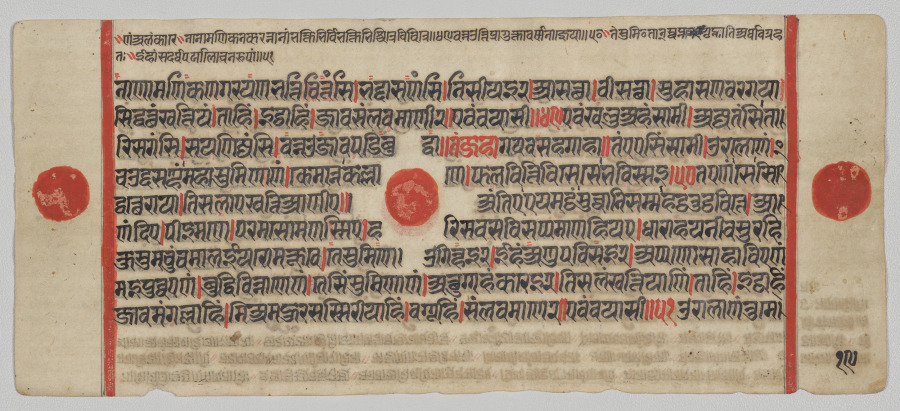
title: Text, Folio 19 (verso), from a Kalpa-sutra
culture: Western India, Gujarat, last quarter of the 15th century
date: c. 1475–1500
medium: Gum tempera, ink, and gold on paper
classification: Painting